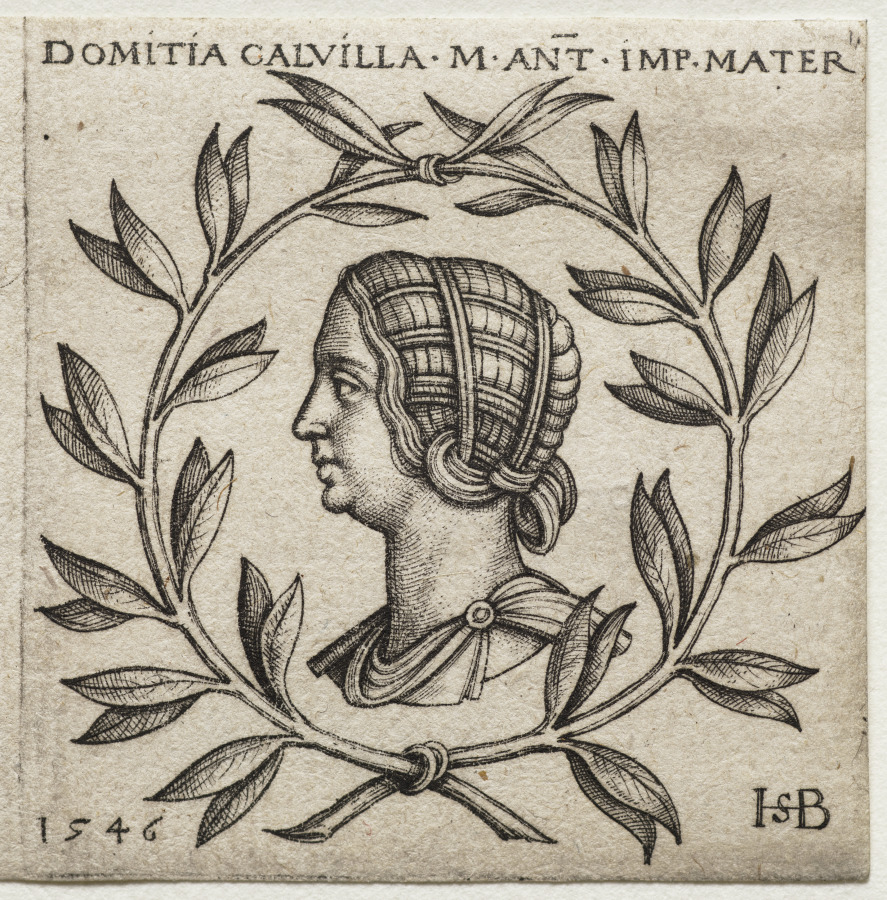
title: Bust of Domitia Calvilla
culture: Germany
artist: Hans Sebald Beham (German, 1500–1550)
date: 1546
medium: engraving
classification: Print